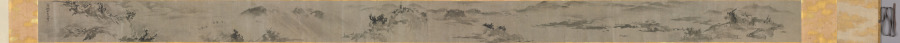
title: Eight Views of Xiao-Xiang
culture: Japan, Muromachi period (1392–1573)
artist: Sesson Shūkei (Japanese, c. 1492–c. 1577)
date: 1500s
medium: handscroll; ink on paper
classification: Painting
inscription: Signature and seal of artist at end of painting.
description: Eight Views of the Xiao and Xiang Rivers can be traced to 11th-century Chinese poems and paintings, the depiction of which had also become popular among Korean and Japanese painters. Xiao-Xiang refers to the region in present-day Hunan province where the Xiao and Xiang rivers converge. Few painters of the Eight Views had in fact seen the scenery; rather, they were trying to portray in ink and wash the lyrical qualities of dim light and a misty atmosphere typical of that region. Each of the poetic titles suggests a time of day, a season, or specific atmospheric conditions—subjects that challenged the abilities of the most talented artists. In this miniature painting (shukuzu) of the Muromachi period, Japanese Zen monk and painter Shukei Sesson depicted all eight views featured in Chinese prototypes: Wild Geese Descending to Sandbar; Returning Sails Off a Distant Coast; Mountain Market in Clearing Mist; River and Sky in Evening Snow; Autumn Moon over Dongting Lake; Night Rain on the Xiao and Xiang; Evening Bell from Mist-Shrouded Temple; and Fishing Village in Evening Glow.